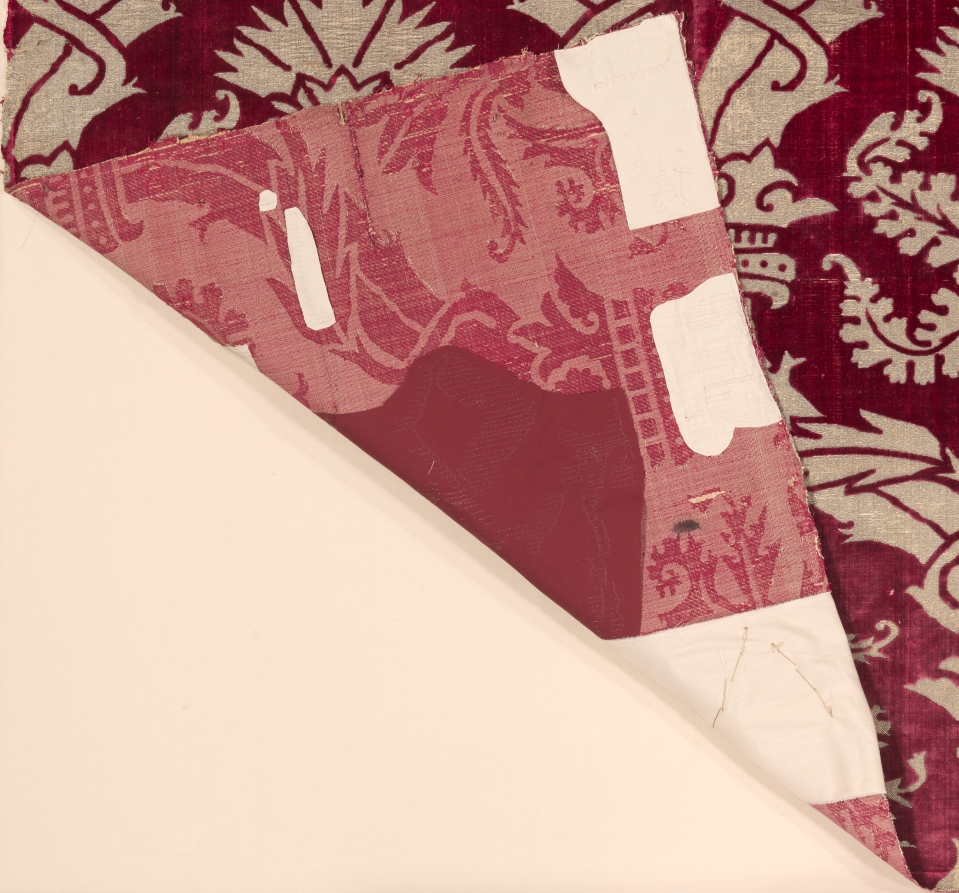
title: Brocaded Velvet Panel with Italianate Pattern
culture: Turkey, Istanbul or Bursa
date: 1575–1625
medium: Silk: velvet, brocaded; gilt-metal thread and cotton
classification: Velvet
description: Rarely are four fabric widths preserved together from any culture. This gilt-metal thread pattern combines Turkish and Italian features: the large ogival (curved) lattice clasped by crowns and the velvet structure are Turkish, and the two so-called artichoke designs are enlarged adaptations of Italian motifs. A symbol of wealth and power, this velvet panel was woven during the artistic height of the Ottoman Empire in the late 1500s. It may have covered a divan (sofa) or possibly enhanced a wall during cold winters in the imperial Topkapi Palace in Istanbul.